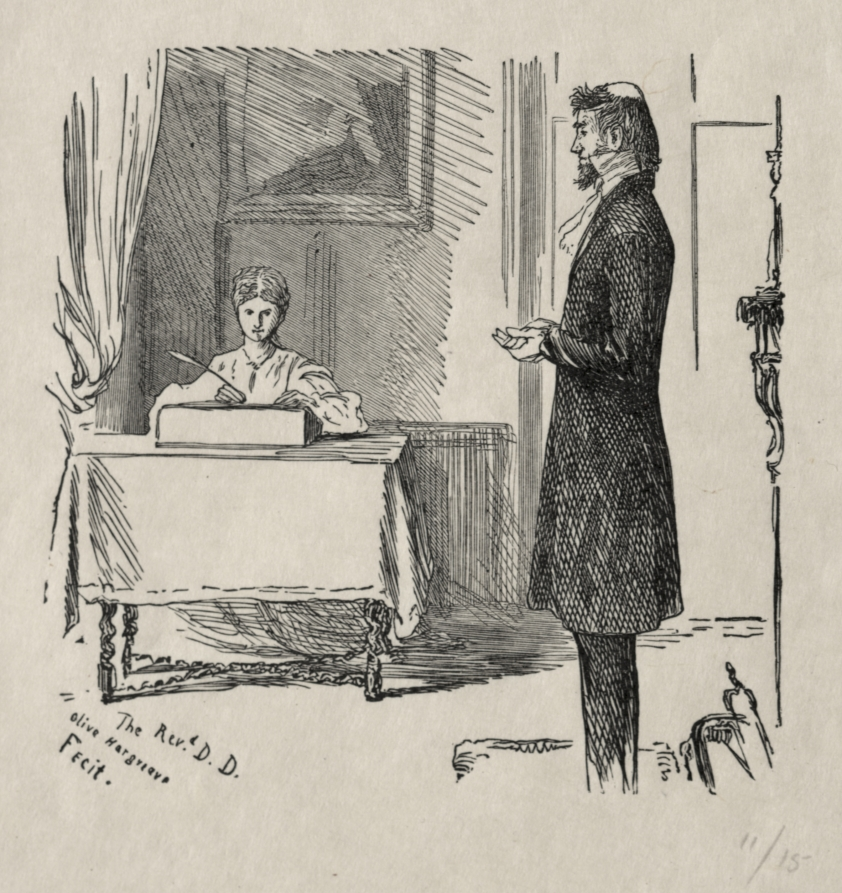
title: Wanted a Curate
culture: England, 19th century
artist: Olive Hargreave (British)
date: 1865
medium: wood engraving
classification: Print